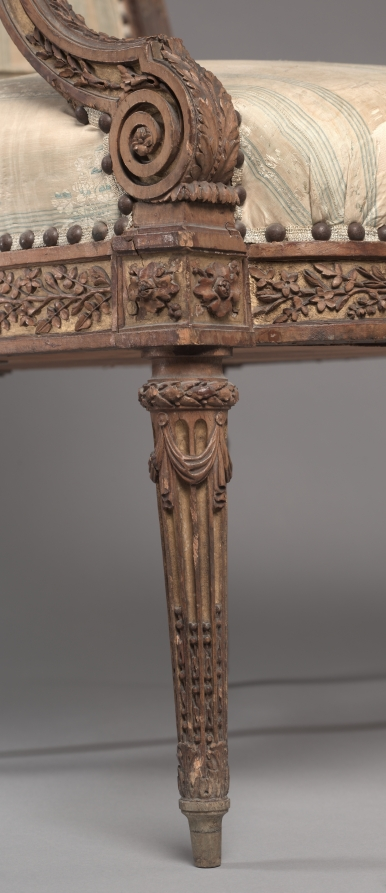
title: Armchair (Fauteuil) (2 of 2)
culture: France, 18th century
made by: Nicolas-Denis Delaisement (French)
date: c. 1785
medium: boxwood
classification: Furniture and woodwork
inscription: signed on front and back of frame of seat underneath: Delaisement with inverted "s."